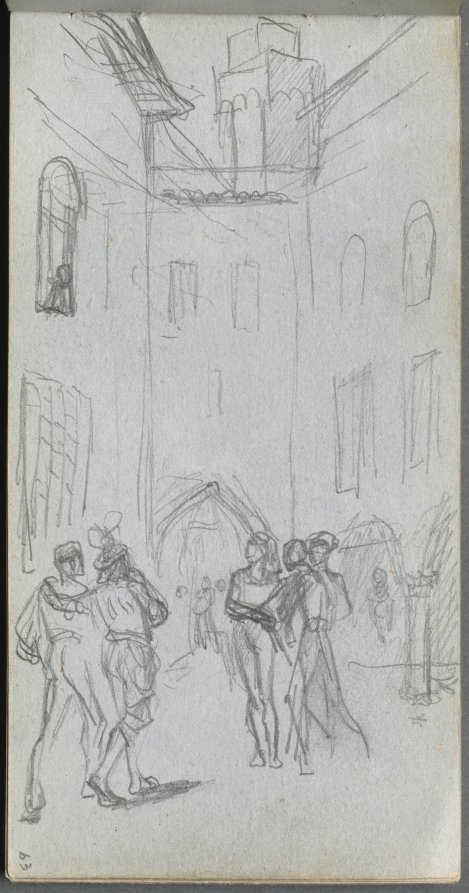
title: Sketchbook, page 63: Figures in a Courtyard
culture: France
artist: Ernest Meissonier (French, 1815–1891)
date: c. 1860s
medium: graphite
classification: Bound Volume